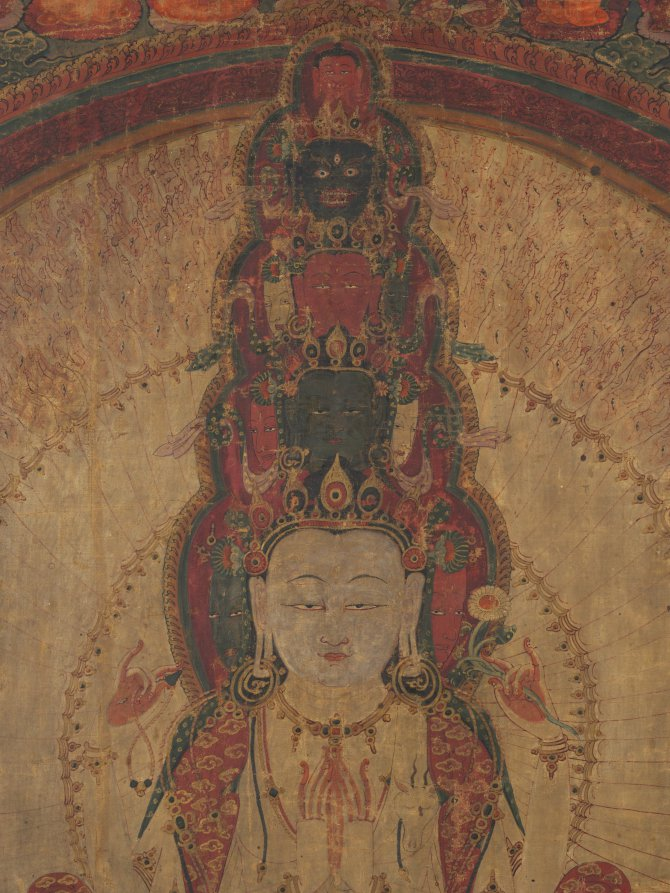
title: Eleven-Headed, Thousand-Armed Bodhisattva of Compassion (Avalokiteshvara)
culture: Western Tibet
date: c. 1500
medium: Gum tempera and ink on cotton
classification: Painting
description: One thousand arms surround the central figure like a radiating halo. Each hand has an eye in the palm to see the suffering of all beings, generating the sense of compassion that this figure embodies. The special form of the central image of the bodhisattva Avalokiteshvara derives from the mystic vision of a nun named Gelongma Palmo, who was born a Kashmiri princess, but prayed for leprosy to avoid having to marry and became an accomplished nun. While meditating in a cave, she achieved this vision of 11-headed, 1,000-armed Avalokiteshvara, who cured her leprosy and guided her on the path to enlightenment.